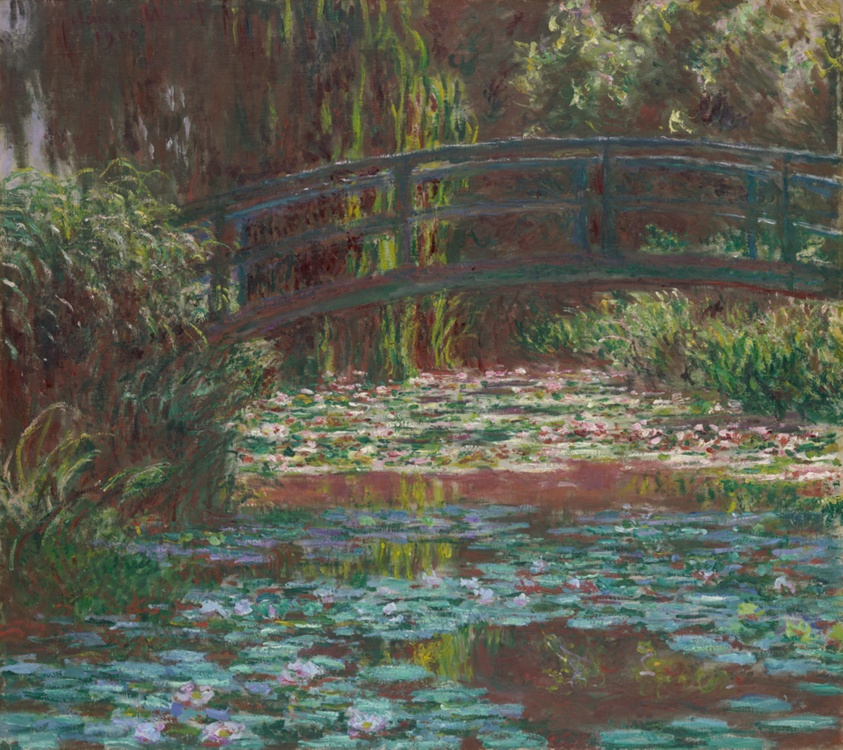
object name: Painting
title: Water Lily Pond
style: Impressionism, 20th Century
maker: Claude Monet (French, 1840–1926)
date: 1900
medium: Oil on canvas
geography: France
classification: painting; european painting; paint; oil paintings (visual works); oil on canvas; french; modern and contemporary art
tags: landscapes, water lilies, trees, pond, Nymphaea, garden, France, foliage, flowers, bridge, weather/seasons, water